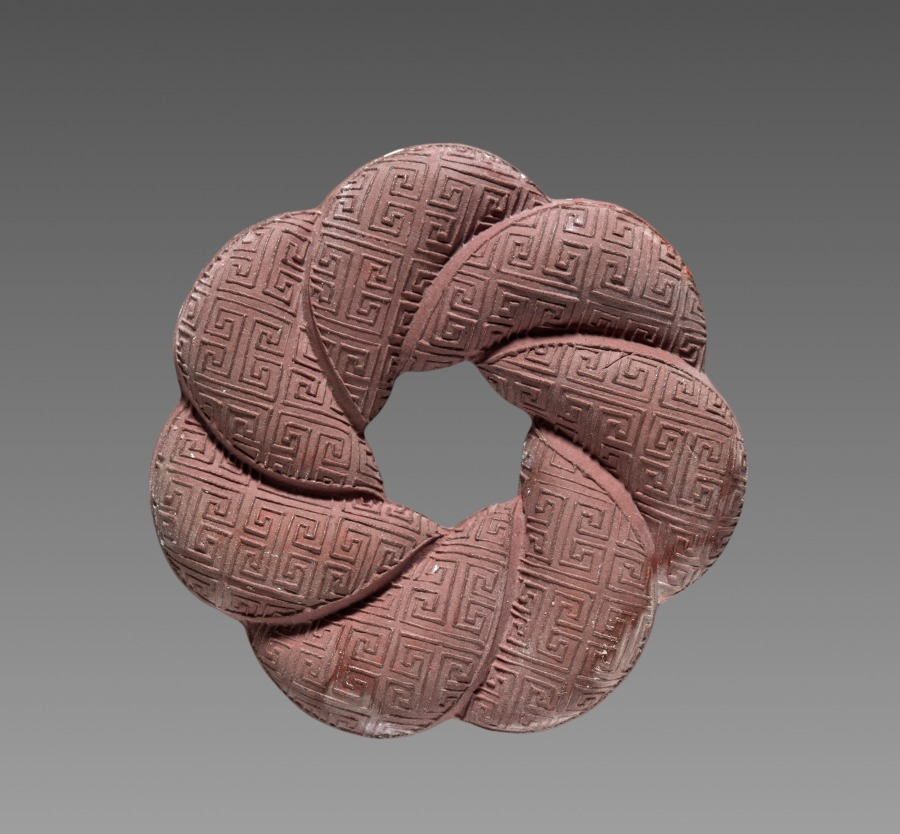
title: Box with Ink Cakes: Red Ink Cake in Shape of a Brocade Knot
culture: China, Qing dynasty (1644-1911), Jiaqing reign (1795-1820)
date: 1795–1820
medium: Molded ink in red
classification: Miscellaneous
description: Ink cakes (also called ink sticks) are dissolved with the addition of water and then ground on the surface of a flat square stone into liquid ink for painting and calligraphy. The precious ink cakes here, however, have never been used. The inscription on the side of the blue ink cake says that the set was commissioned by Chen Huai, Governor of Jiangxi Province.